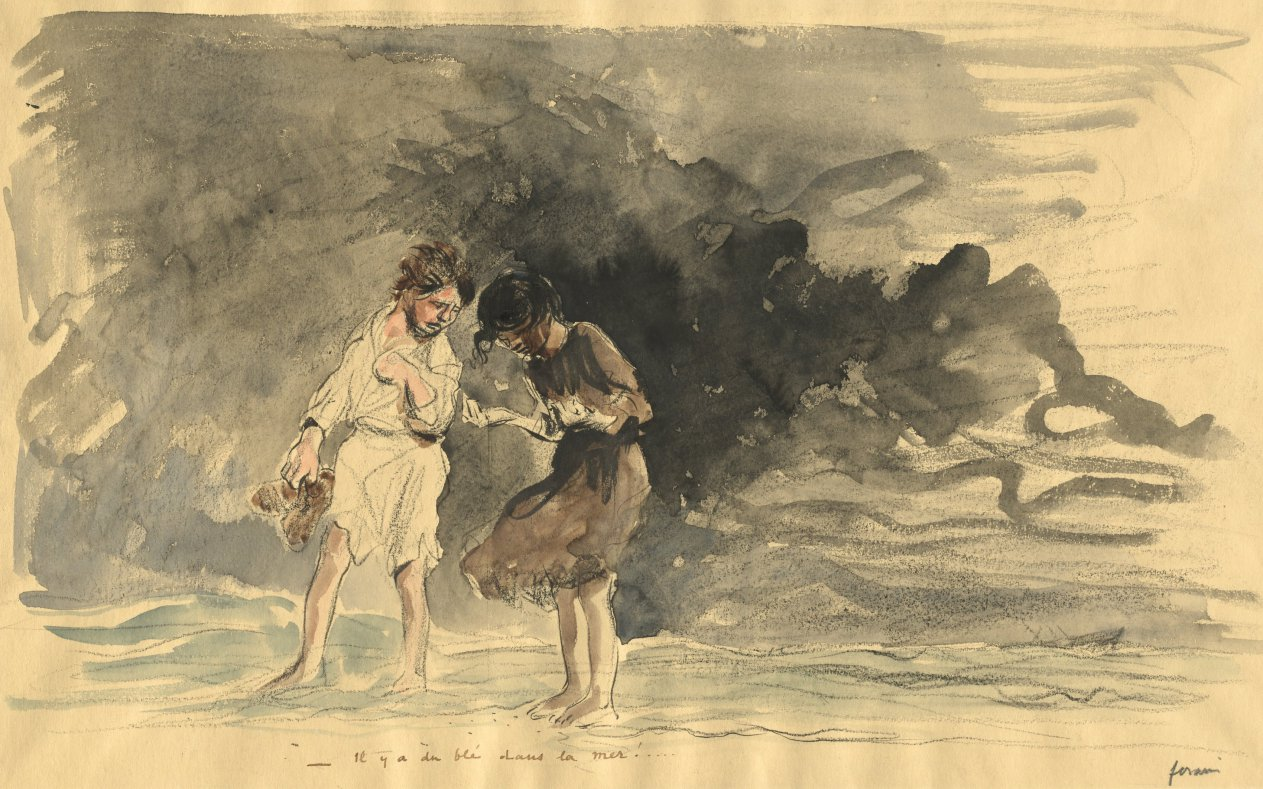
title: There is corn in the sea!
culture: France, late 19th-early 20th Century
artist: Jean Louis Forain (French, 1852–1931)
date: fourth quarter 1800s or first third 1900s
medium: brush and black ink and watercolor over black crayon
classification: Drawing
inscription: signed, lower right, in graphite: forain ; by artist, lower center, in brown watercolor: __ il y a du blé dans la mer! .... ; lower left, in graphite: Guerre Sous-Marine (1) ; lower center, in graphite: "On va dire à Maman que c'est plein de blé, l'eau de mer." ; VERSO, lower center, in graphite: 14